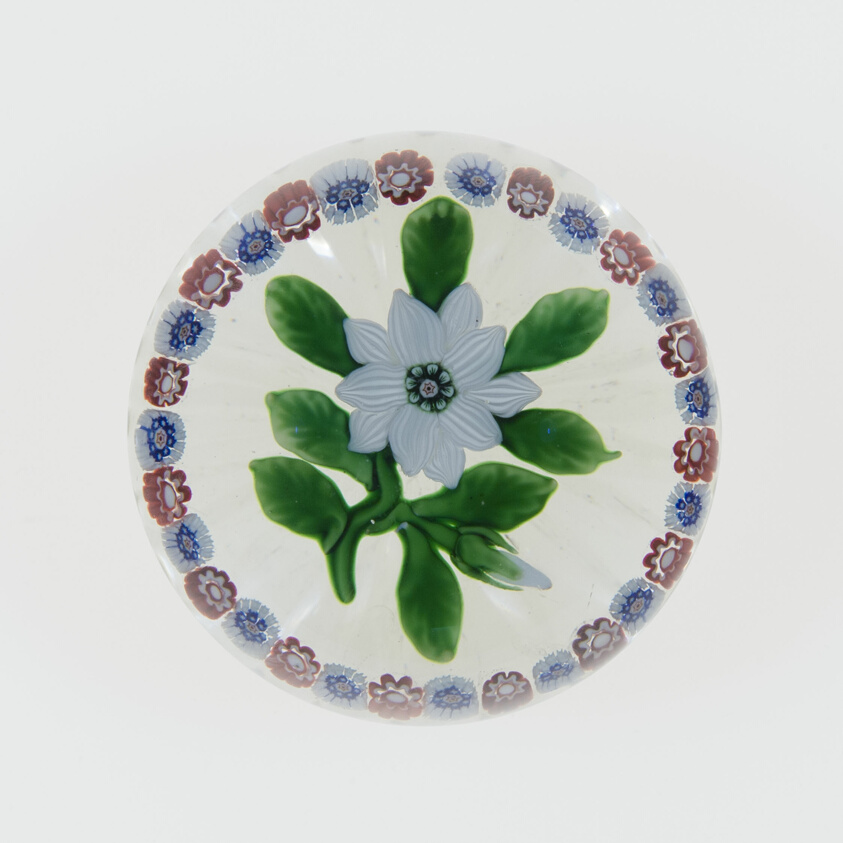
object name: Glass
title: Paperweight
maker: Baccarat Glassworks (Cristalleries de Baccarat); Lorraine, France, founded 1764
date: c. 1848–55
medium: Glass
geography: Lunéville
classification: paperweight; lampwork; european decorative arts; glass